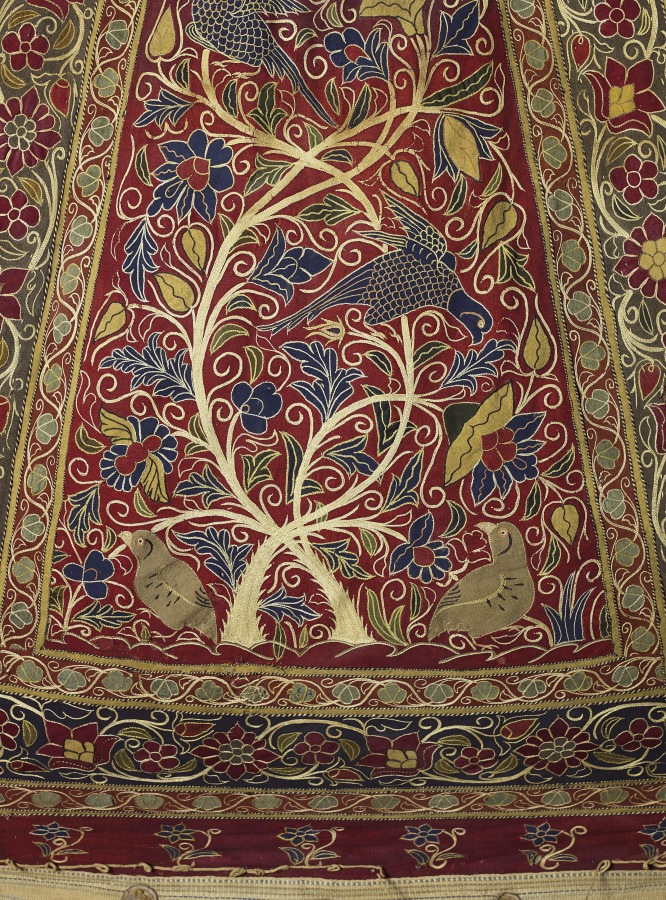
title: Royal Round Tent made for Muhammad Shah (Roof)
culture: Iran, Rasht, Qajar period (1779-1925)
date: 1834–48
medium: Interior: wool: plain weave, inlaid work; silk: embroidery, chain stitch; tape, leather; Exterior: cotton, wool: plain weave; rope, iron ring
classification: Textile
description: Royal tents were potent symbols of authority, wealth, and power throughout the greater Middle East. Rulers owned thousands of tents. They were used for shelter, shade, and innumerable functions in tent compounds that were essential for imperial ceremonies, travel, and military campaigns. Distinguished by size with elaborately decorated interior walls and ceilings, tents could be as large as castles. Opulent tents were also presented as imperial gifts. Tents are only known through documents before 1600. For example, in Baghdad in 809, Caliph Harun al-Rashid owned 4,000 ceremonial tents and 150,000 camping tents that were stored in the imperial Abbasid treasury. An astonishing variety and quantity of tents were housed in the royal Fatimid tent storeroom in Cairo in 1068-69, including "military tents, fortress tents, and castle tents, manufactured of . . . gold-brocaded stuff embroidered with designs of elephants, wild beasts, horses, peacocks, birds." Since 1600, Ottoman Turkish tents with elaborate floral decoration have been preserved in Istanbul in the Topkapi Palace Museum and Military Museum, and in European collections as war booty, primarily from the Ottoman Turks' attempt to conquer Vienna in 1683. These tents are not done in the Rasht technique, but rather are applique. In contrast, royal tents from Iran are extremely rare. This spectacular ceremonial tent is embroidered with the name of its owner, Muhammad Shah, who ruled Iran from 1834 to 1848 during the Qajar dynasty. The radiant jewellike interior features exuberant flora, blossoming vines, and robust birds made with colored wool embellished with silk-thread embroidery.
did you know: Rasht work is named after the city on the Caspian Sea in present-day Iran, which was a major silk trade center with numerous textile workshops.